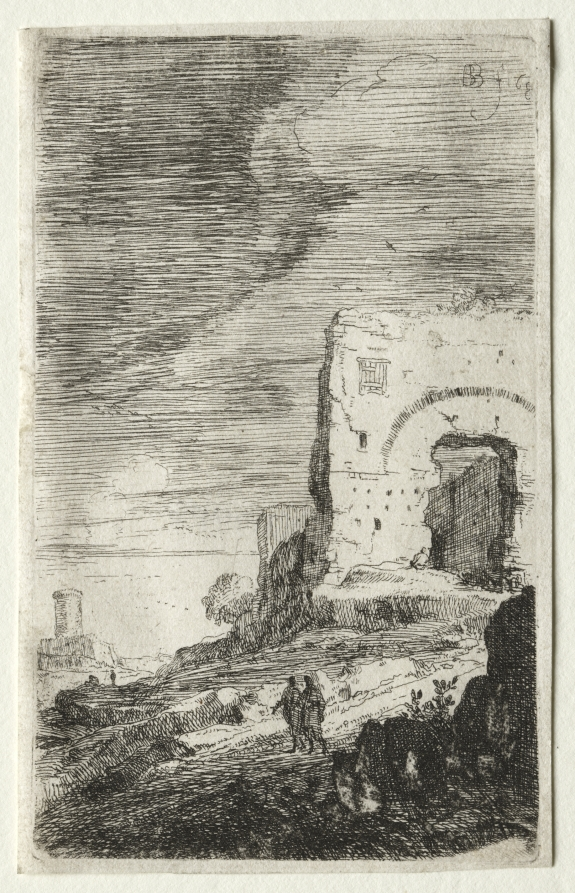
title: The Baths of Caracalla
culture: Netherlands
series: Ruins of Rome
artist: Bartholomeus Breenberg (Dutch, 1599–1657)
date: 1639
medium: etching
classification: Print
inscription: upper right, in plate: BB f 163 ; VERSO, upper center, in pen and brown ink: 2100 ; upper center, in graphite: af[rp?]ige 143 ; center, in graphite: B 13 / Thermae of / Caracalla ; lower center, in graphite: C13783 / B13- ; lower center, in graphite: 7196 ; lower right, in graphite: c. 7196